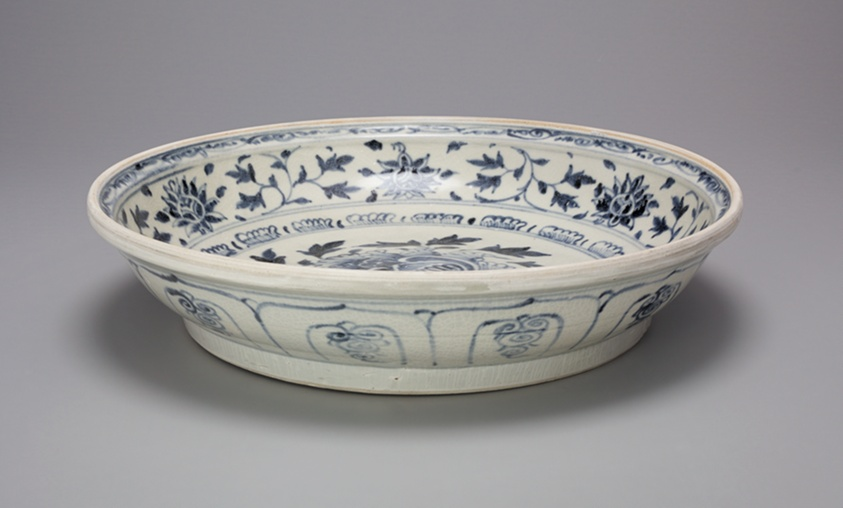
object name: Ceramics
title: Large Dish with Pomegranate and Leaf Design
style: Southeast Asian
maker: Vietnam; near Hoi An (offshore)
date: Late 15th/early 16th century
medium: Glazed stoneware with cobalt-blue underglaze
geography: Vietnam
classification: plate (general, dish); dish (vessel); ceramics